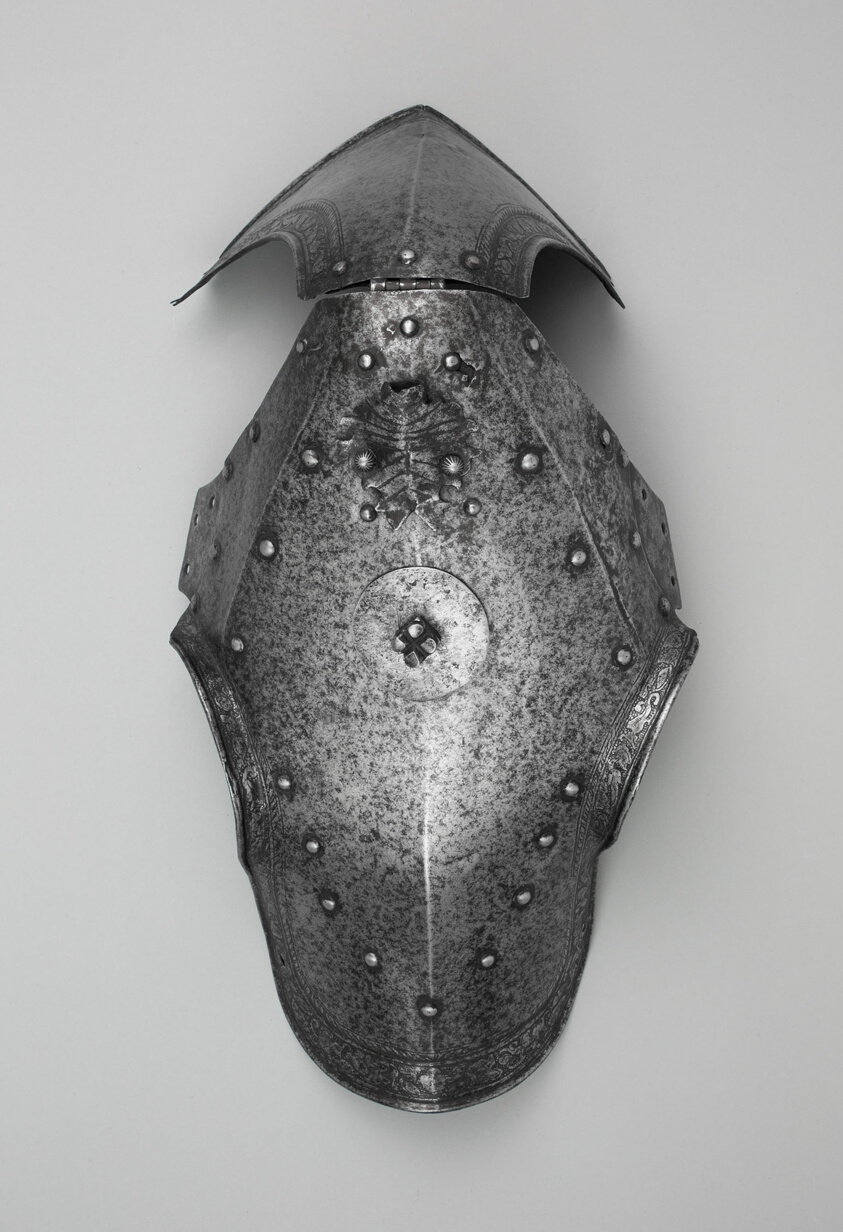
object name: Armor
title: Demi-Shaffron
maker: Italian, Milan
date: 1570/80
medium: Steel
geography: Italy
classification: horse equipment; armor; arms and armor